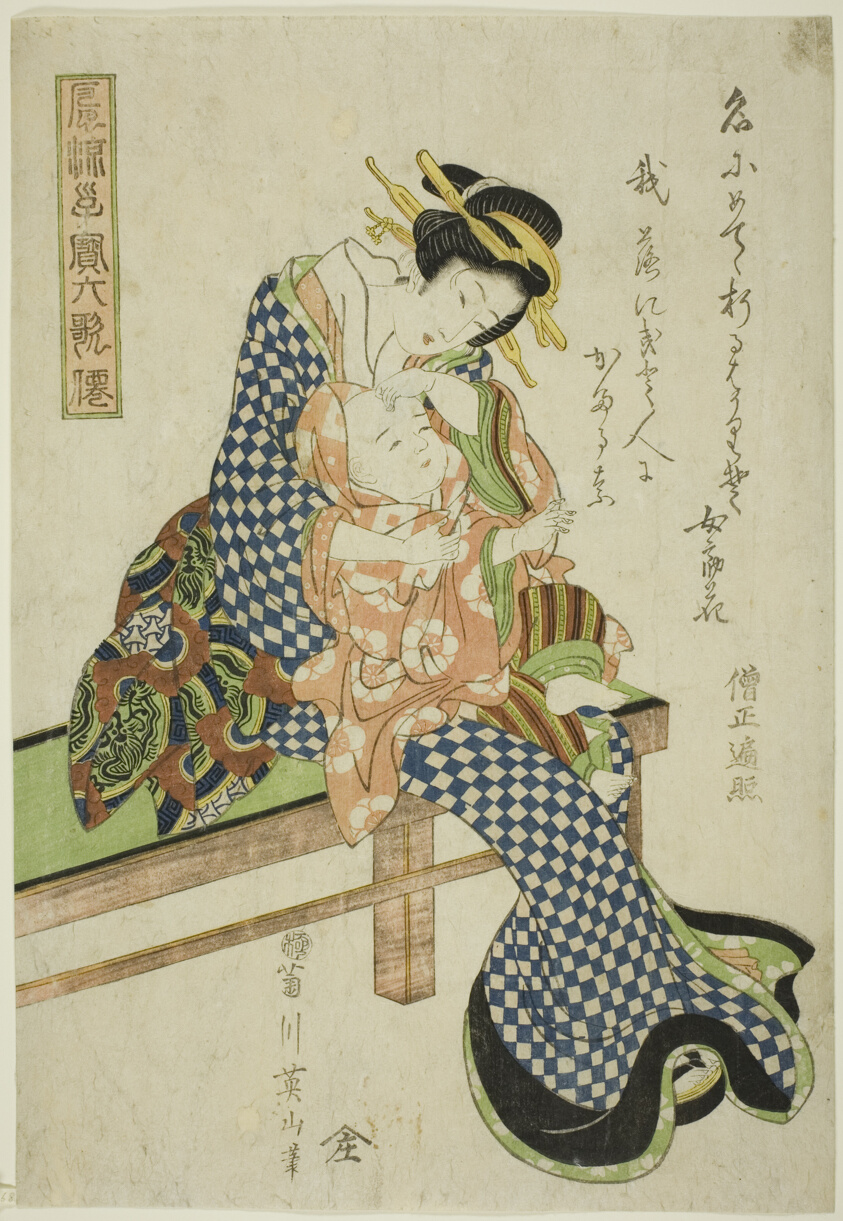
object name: Print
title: Sojo Henjo, from the series "Fashionable Children as the Six Immortal Poets (Furyu kodakara rokkasen)"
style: Japanese (culture or style)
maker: Kikukawa Eizan (Japanese, 1787-1867)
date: c. 1814/17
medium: Color woodblock print; oban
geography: Japan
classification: woodblock print; print; asian art